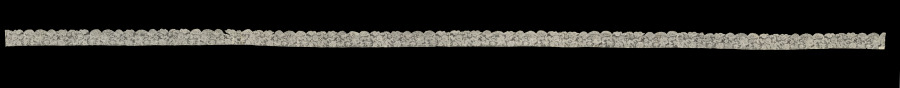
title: Lace Edging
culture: Belgium, Brussels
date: early 1700s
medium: Bobbin lace (Point d'Angleterre)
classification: Lace